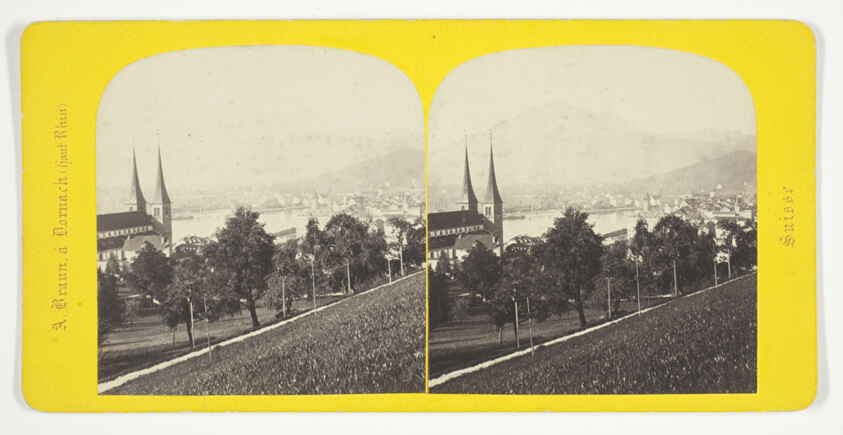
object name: Photograph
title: Lucerne, from the series "Suisse"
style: 19th century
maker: A. Braun; French, 1811–1877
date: 1850/77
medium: Albumen print, stereo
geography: France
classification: stereograph (albumen); albumen silver print; photographic process; photography; photograph